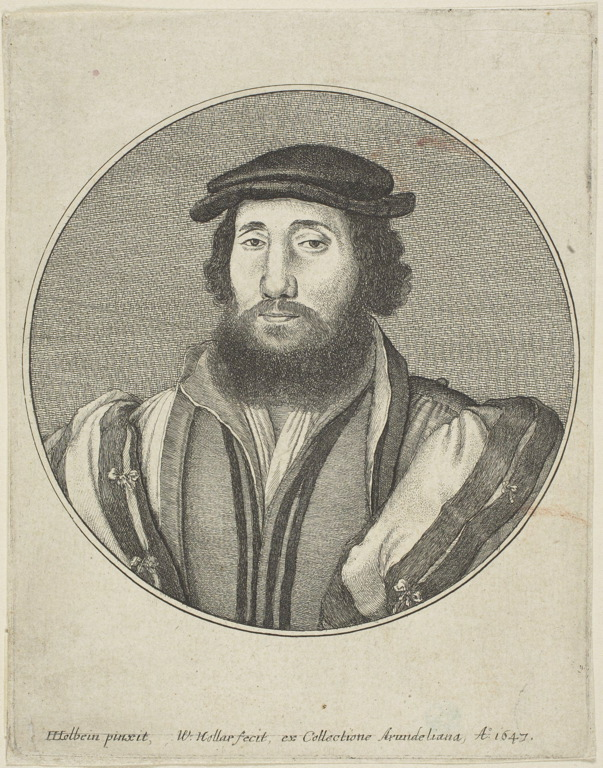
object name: Print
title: Bearded Man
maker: Wenceslaus Hollar (Bohemian, 1607-1677); after Hans Holbein the younger (German, c.1497-1543)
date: 1647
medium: Etching on ivory laid paper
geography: Bohemia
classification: etching; print; prints and drawing